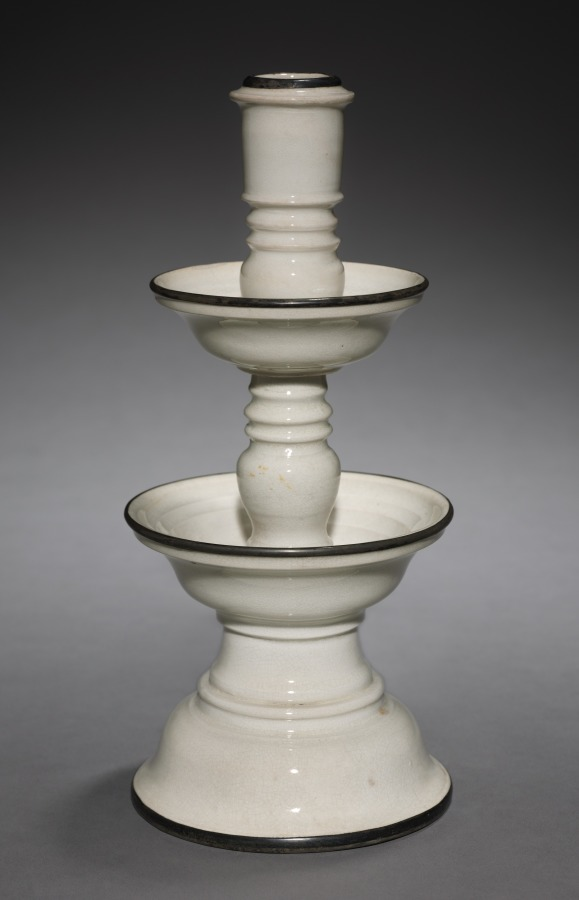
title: Candlestick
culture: China, Ming dynasty (1368–1644)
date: 1600s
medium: glazed porcelain with metal rims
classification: Ceramic